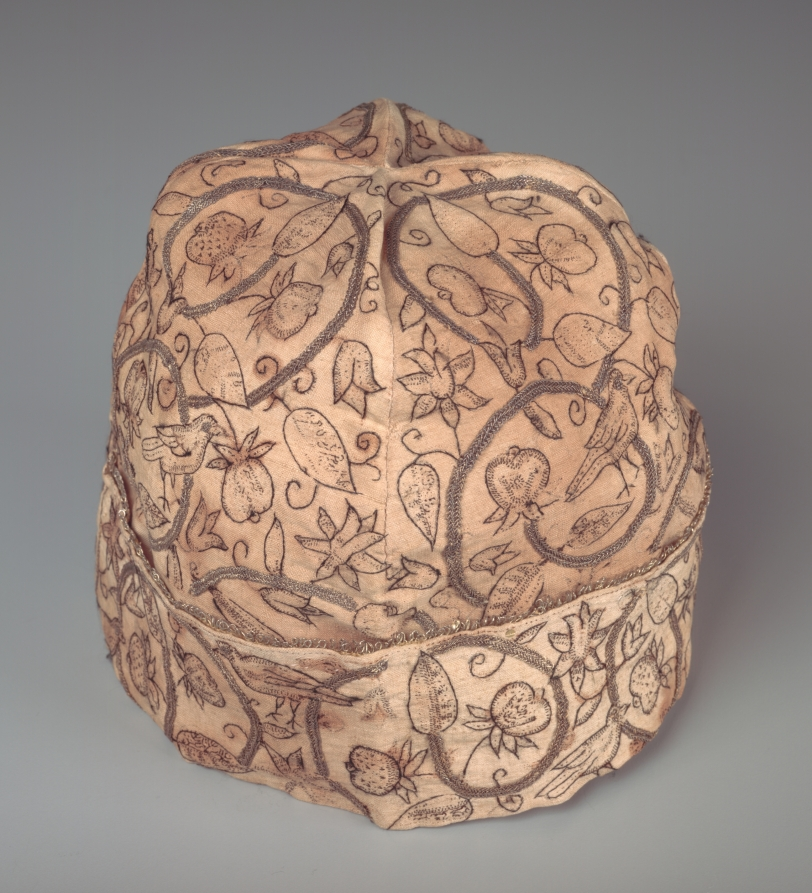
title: Man's Cap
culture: England, Elizabethan Period, late 16th century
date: late 1500s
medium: embroidery; silk and silver gilt thread on linen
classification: Embroidery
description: According to Elizabethan embroidery scholar Jacqui Carey, the construction and design of this man’s nightcap is typical of the period. The embroidery on this nightcap—worked with both black silk thread and silver metal thread (metal strips wrapped around a white silk core) onto a plain weave linen fabric—features daffodils, birds, and fruit set within coiling stems and foliage. Five different stitches are used, including Elizabethan plaited braid stitch, chain stitch, stem stitch, straight stitch, and Elizabethan spider’s web stitch. The arrangement of the motifs is the same in each quadrant, and similar motifs are repeated around the brim. In places, the ink lines of the design are visible on the fabric, though most are covered with the embroidery.